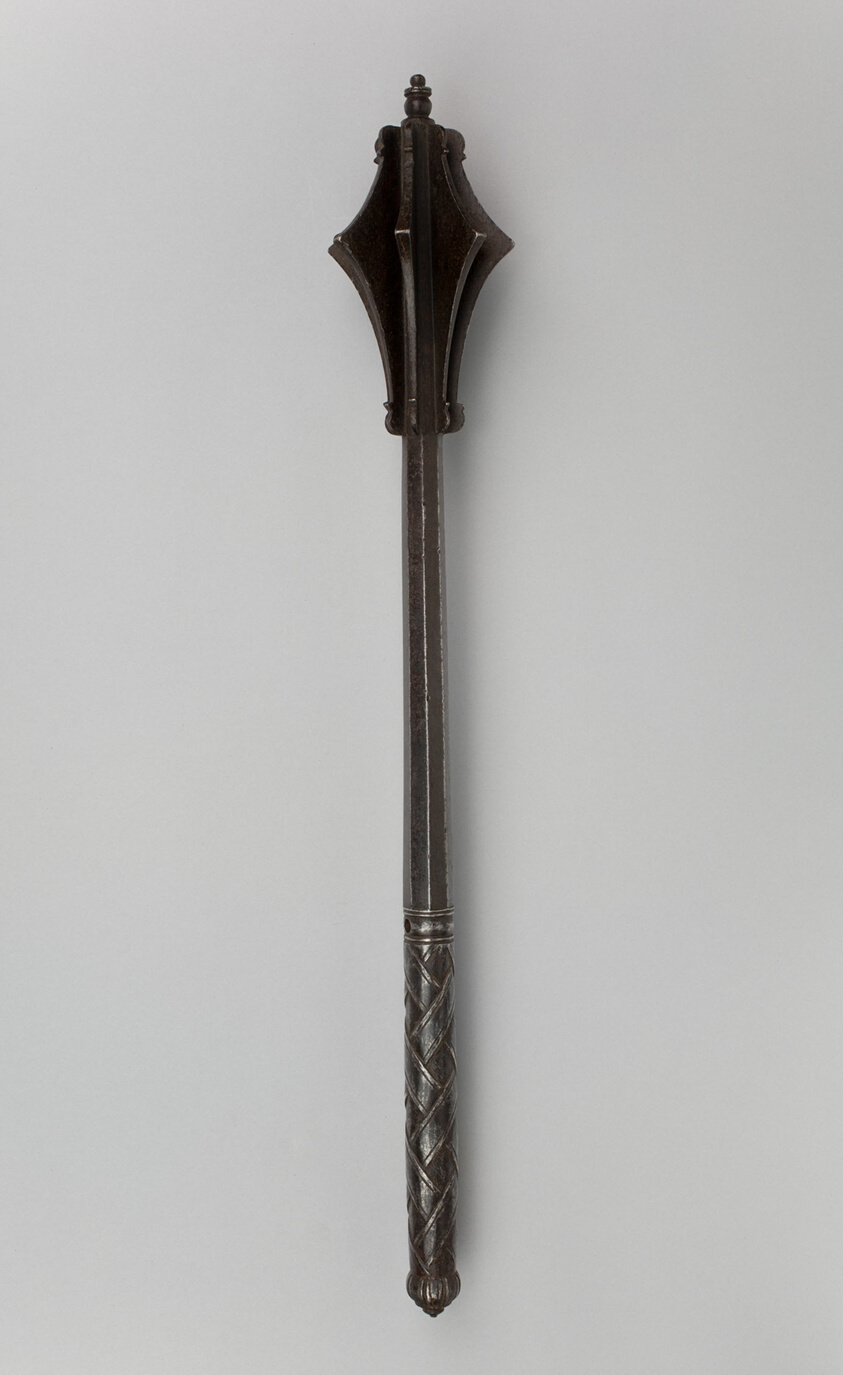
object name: Arms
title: Mace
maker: German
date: 1550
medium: Steel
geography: Germany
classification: shafted weapon; arms; arms and armor